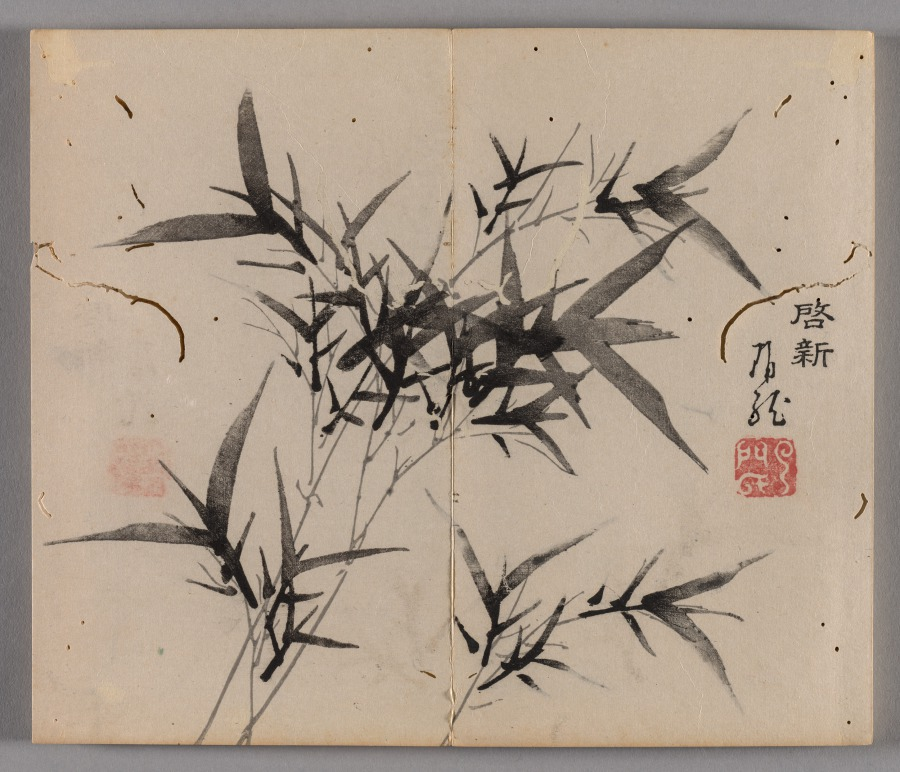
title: Ten Bamboo Studio Painting and Calligraphy Handbook (Shizhuzhai shuhua pu): Bamboo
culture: China, Qing dynasty (1644-1911)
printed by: Hu Zhengyan (Chinese, c. 1584–1674)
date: 1633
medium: Woodblock-printed book; ink and colors on paper; first edition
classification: Print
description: Color printing reached a level of perfection in the early 1600s, as seen in this Ten Bamboo Studio Collection of Calligraphy and Painting and the Mustard Seed Garden Manual of Painting (printed 1679 and 1701). The painterly quality, precision in registering (aligning) the woodblocks, and harmonious colors made them the most successful color print editions in Chinese history. Both editions were printed and compiled in Nanjing, spread nationwide, and had a great impact on the arts in Japan and Korea.